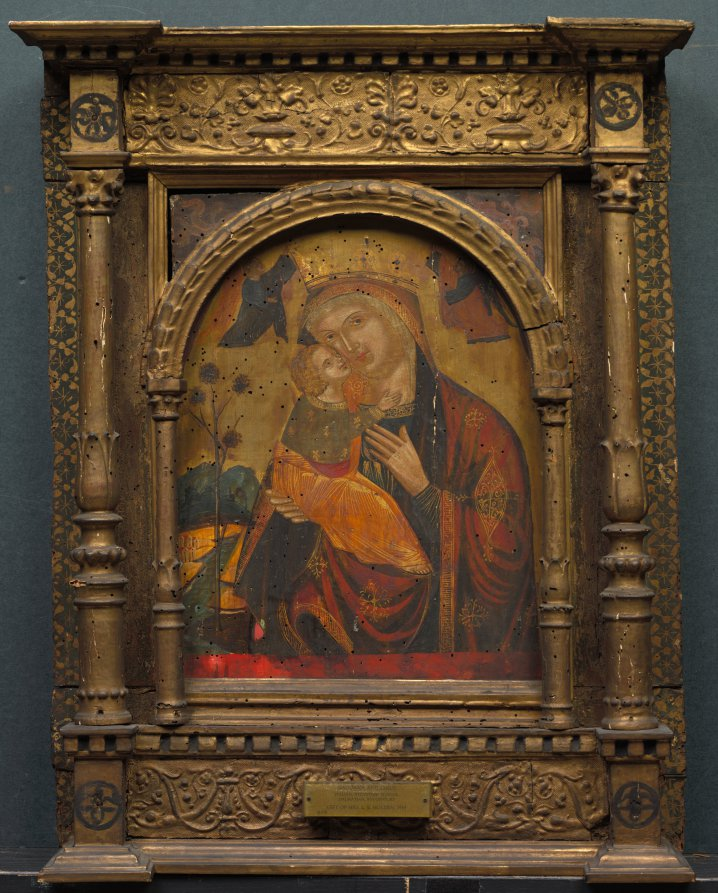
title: Virgin and Child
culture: Byzantine (Dalmatian?), 15th century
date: 1400s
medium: tempera and gold on wood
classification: Painting